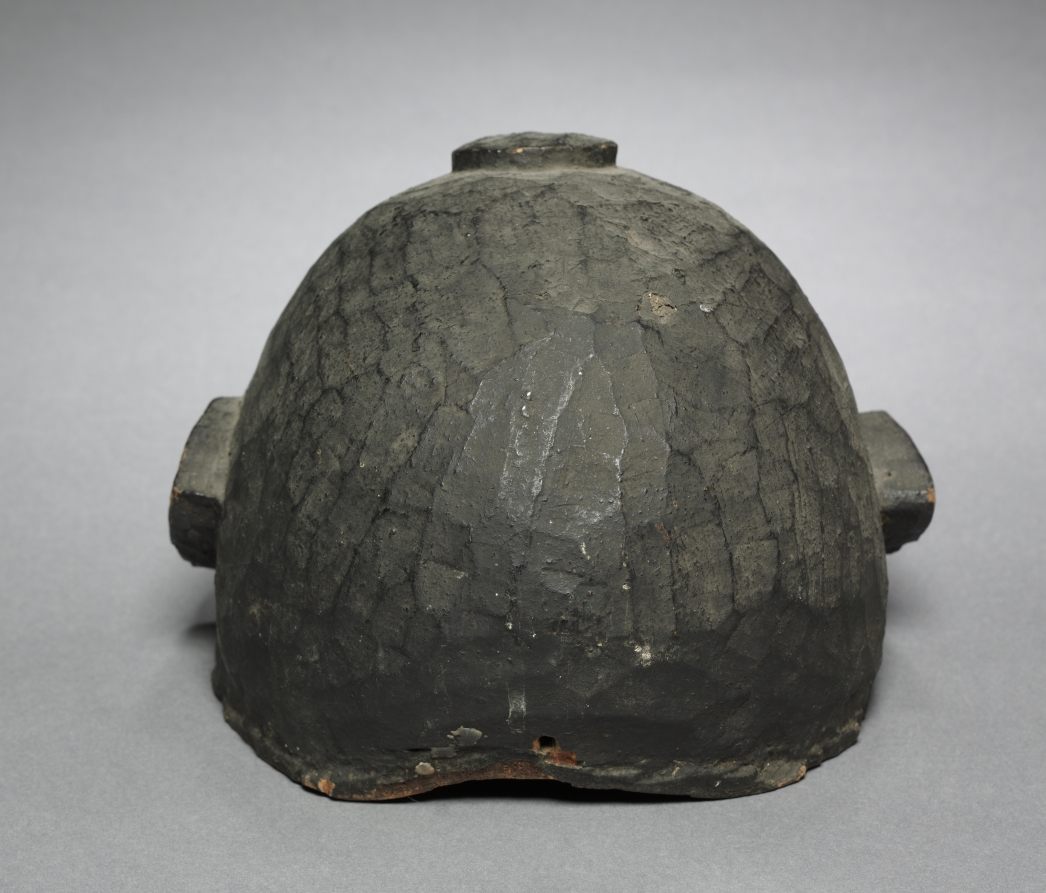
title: Mask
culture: Africa, West Africa, Nigeria, Yorùbá-style maker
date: c. 1910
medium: Wood and paint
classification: Mask